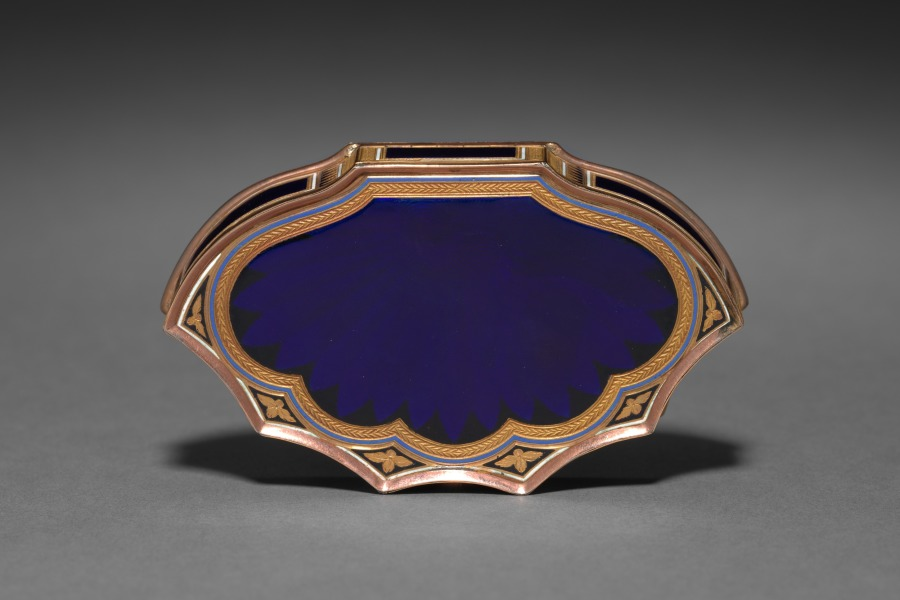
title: Box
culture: Switzerland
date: early 1800s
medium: gold and enamel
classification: Enamel